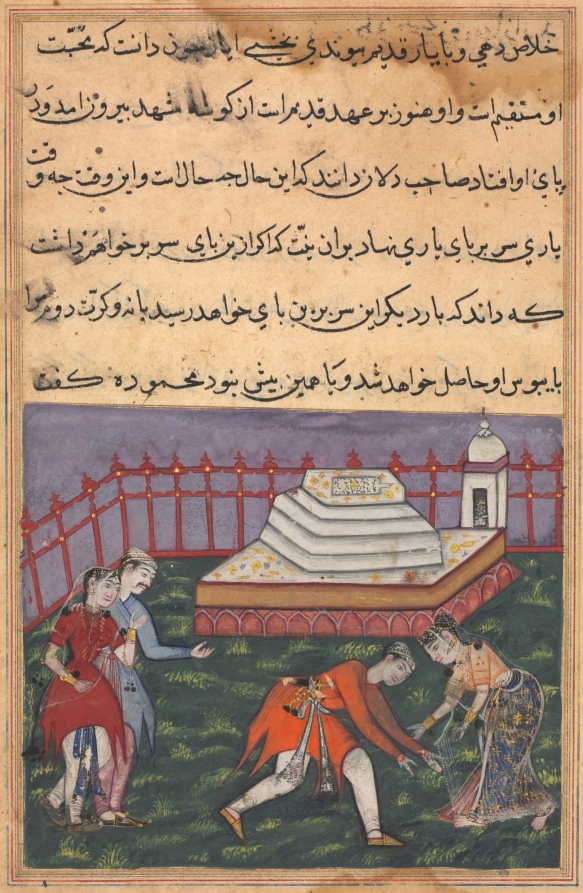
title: Hearing her declaration of love, Ayaz falls at the feet of Mahmuda at the holy shrine. The scene is witnessed by Salim, Ayaz’s friend, and a maid, from a Tuti-nama (Tales of a Parrot): Thirty-third Night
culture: Mughal India, court of Akbar (reigned 1556–1605)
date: c. 1560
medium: gum tempera, ink, and gold on paper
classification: Painting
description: On the right, an ecstatic Ayaz, dressed in the orange tunic, reunites with his lover, Mahmuda, in a cemetery after her unwilling marriage to another man. Despite this separation, their mutual love has remained true. Salim, watching the reunion with Mahmuda’s maid, quickly devises a plan that will allow the couple to remain together.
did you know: The red fence designates the boundary of a sacred space.